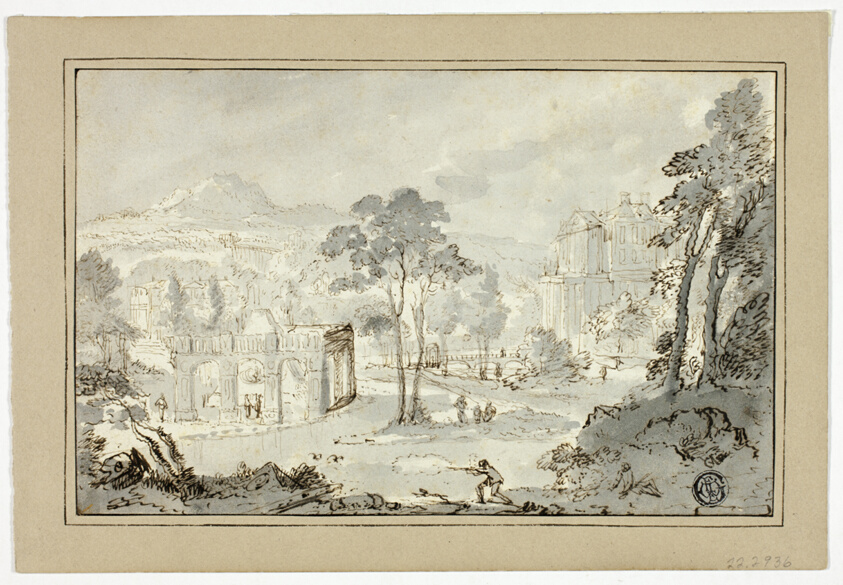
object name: Drawing and Watercolor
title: Hunter with Dog, Other Figures in Landscape with Villa, Canal, Pyramid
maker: Gaspar van Wittel (Dutch, 1652-1736)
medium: Pen and brown ink, with brush and gray wash, on ivory laid paper, laid down on brown wove paper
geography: Netherlands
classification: pen and ink drawings; drawings (visual works); prints and drawing